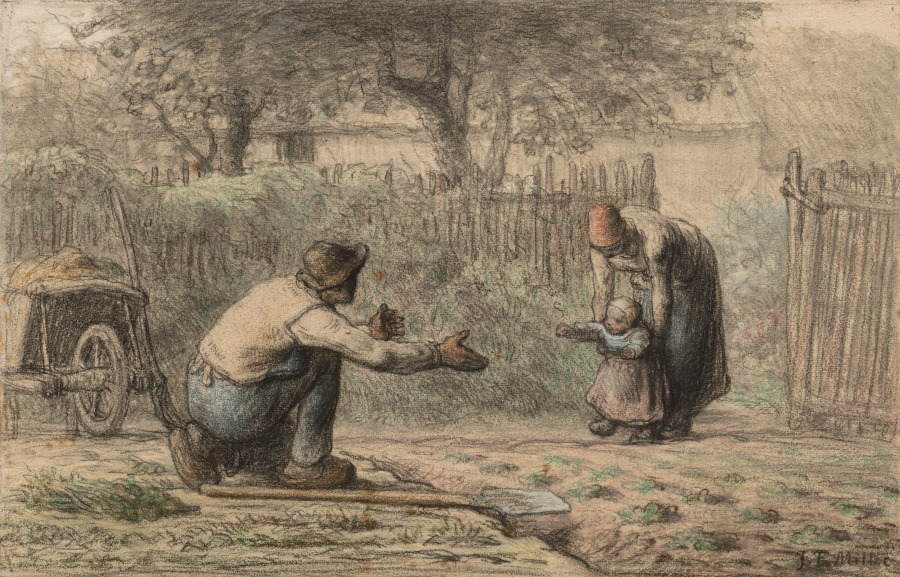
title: First Steps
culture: France, 19th century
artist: Jean-François Millet (French, 1814–1875)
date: c. 1859–66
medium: black chalk and pastel on beige laid paper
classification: Drawing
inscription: signed, lower right, in black chalk: J. F. Millet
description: In the 1860s Jean-François Millet began to add pastel to his black chalk drawings of peasants and rural life, with the hope that the addition of color would make his monochromatic drawings more marketable. Between 1865 and 1869, he worked almost exclusively in pastel, producing more than 100 works. The taste for “enhanced” or “pastelled drawings,” as Millet described them, grew among collectors and artists, and inspired a revival of the medium in the 1870s and 1880s. Here, in a fenced-in garden behind a house, parents encourage their child to walk for the first time. Delicate passages of blue, green, yellow, and red enliven the composition.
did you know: At the time this drawing was made, many critics disparaged Millet's depictions of peasants as politically radical.